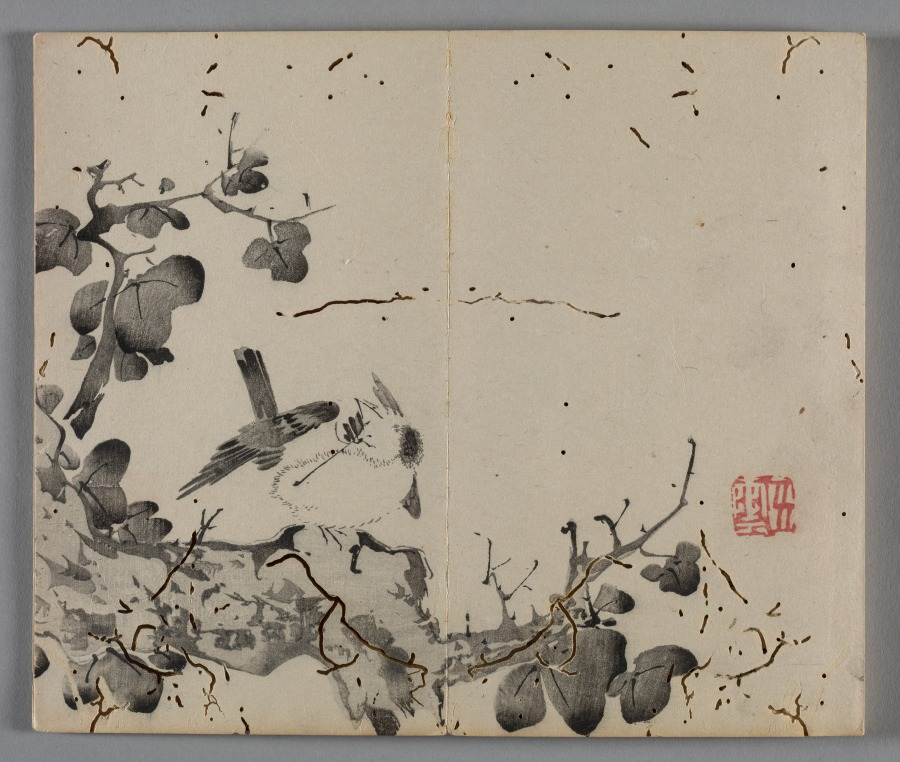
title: Ten Bamboo Studio Painting and Calligraphy Handbook (Shizhuzhai shuhua pu): Birds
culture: China, Qing dynasty (1644-1911)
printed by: Hu Zhengyan (Chinese, c. 1584–1674)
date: 1633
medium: Woodblock-printed book; ink and colors on paper; first edition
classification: Print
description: Color printing reached a level of perfection in the early 1600s, as seen in this Ten Bamboo Studio Collection of Calligraphy and Painting and the Mustard Seed Garden Manual of Painting (printed 1679 and 1701). The painterly quality, precision in registering (aligning) the woodblocks, and harmonious colors made them the most successful color print editions in Chinese history. Both editions were printed and compiled in Nanjing, spread nationwide, and had a great impact on the arts in Japan and Korea.